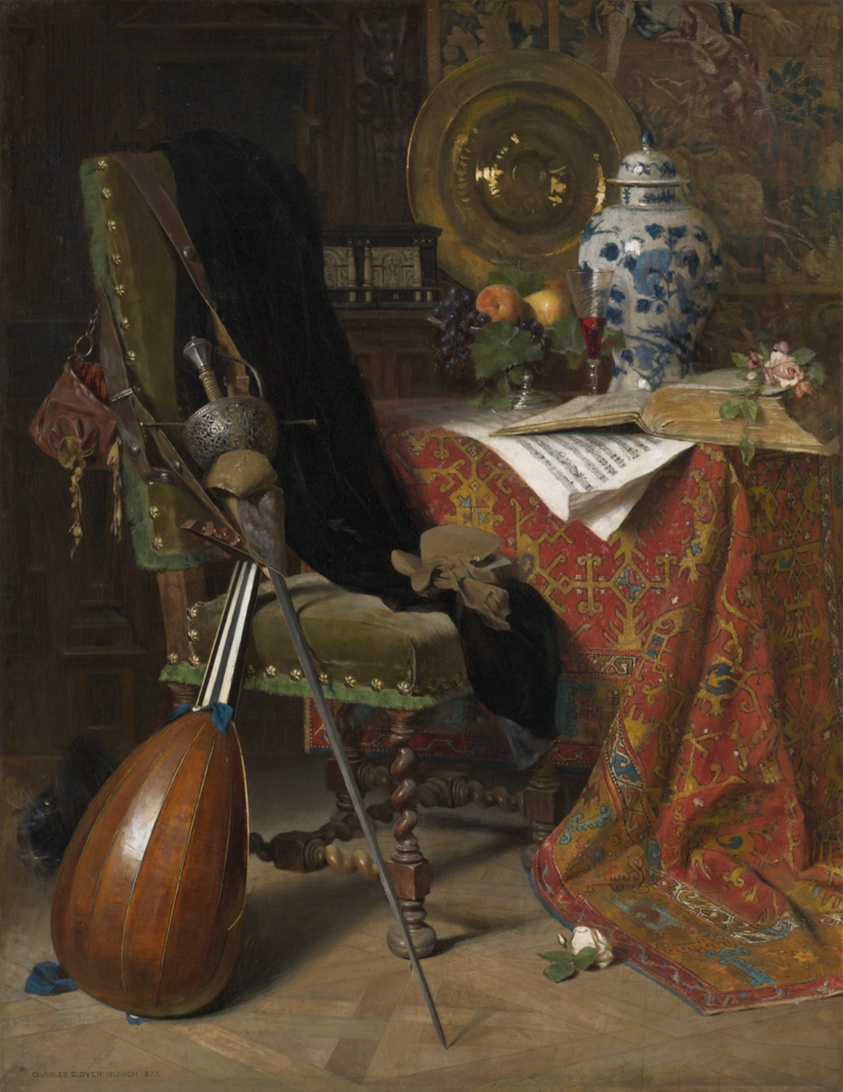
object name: Painting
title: Seventeenth-Century Interior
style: Realism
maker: Charles Gifford Dyer (American, 1846–1912)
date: 1877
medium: Oil on canvas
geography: Munich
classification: painting; american arts